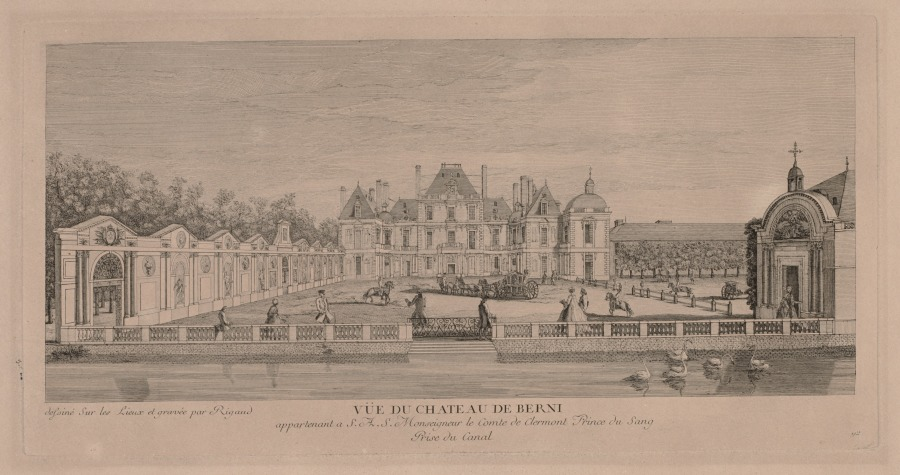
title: Chateau of Berny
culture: France, 18th century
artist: Jacques Rigaud (French, 1681–1754)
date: c. 1720–50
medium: engraving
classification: Print